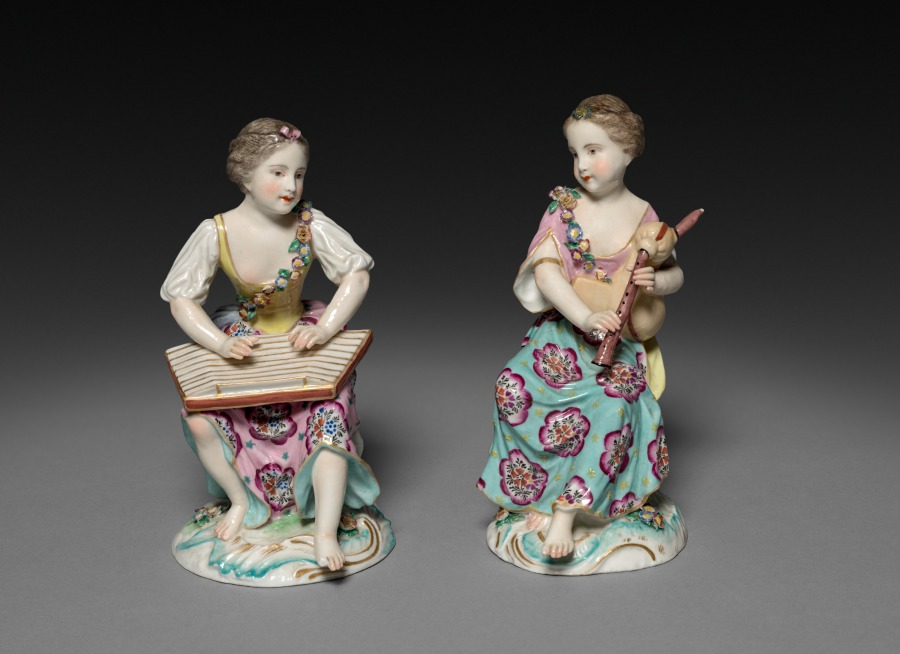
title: Girl Musicians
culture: Germany, 18th century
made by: Frankenthal Porcelain Factory (German)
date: c. 1770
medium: porcelain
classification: Ceramic